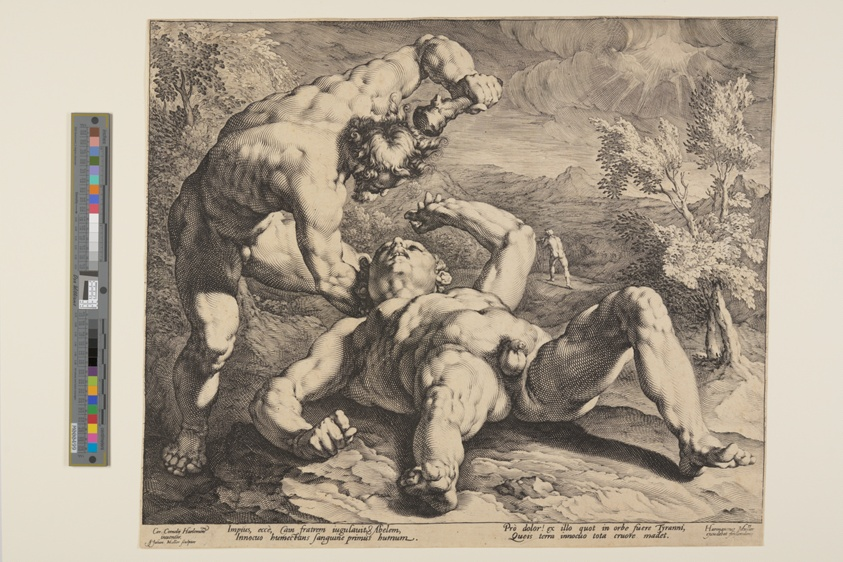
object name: Print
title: Cain Killing Abel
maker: Jan Harmensz Muller (Dutch, 1571–1628); after Cornelis van Haarlem (Dutch, 1562–1638)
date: c. 1589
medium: Engraving on ivory laid paper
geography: Netherlands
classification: engraving; paper; print; prints and drawing